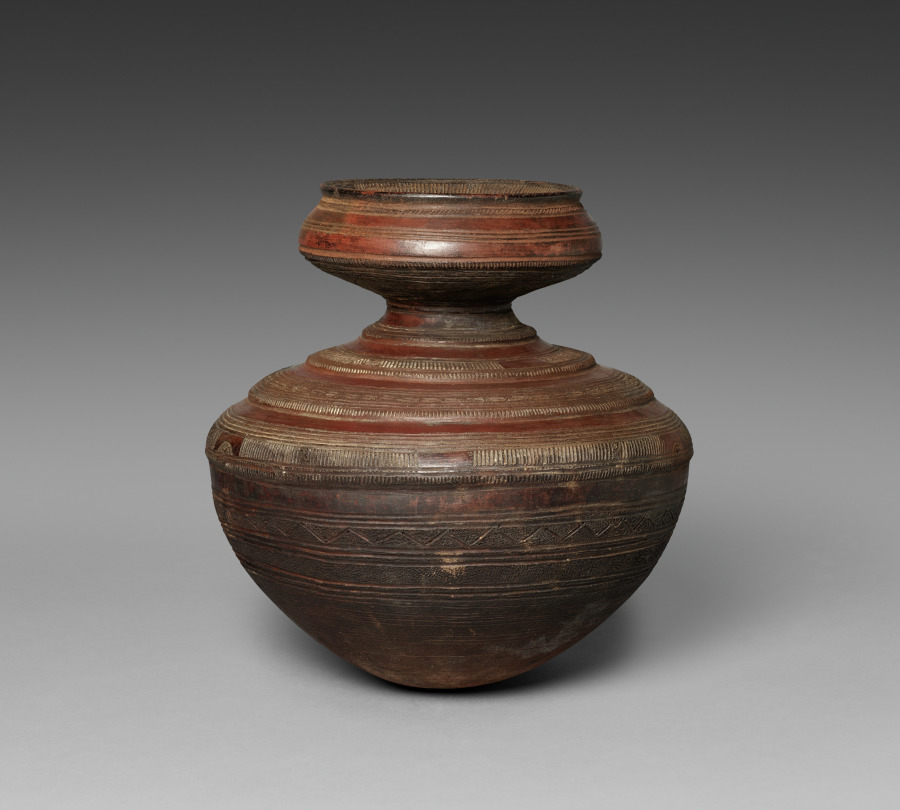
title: Water Transport Jar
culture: Africa, West Africa, Nigeria, Nupe-style pottery, unknown female potter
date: 1900s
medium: Terracotta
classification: Vessels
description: The Nupe, an Islamic people from northern Nigeria, embellish pottery and metalwork with intricate, nonrepresentational patterning. A female potter built this vessel by joining two bowls into a globe shape, then adding the neck. After drying, she used shells to press in designs before burnishing the exterior to a high shine. Finally, she fired the gourd-shaped vessel in a furnace. The patterns beautify and allow a firm grip when lifting the vessel. As the Gwari and Nupe people are neighbors, pottery shapes and designs often transferred between them. Look for similar zigzags and concentric lines on the nearby Gwari-inspired vessels.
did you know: The shape of this vessel probably developed from real gourds used to hold liquids.